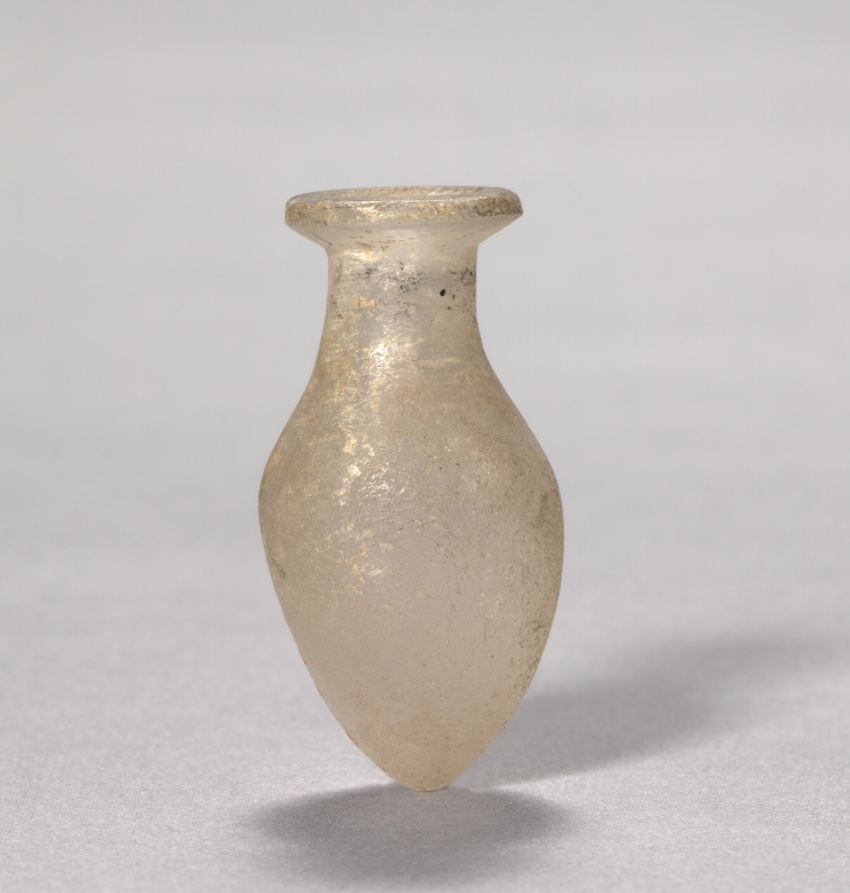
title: Magic Bottle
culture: Egypt, Old Kingdom (2647–2124 BCE), Dynasties 5–6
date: 2300–2124 BCE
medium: quartz crystal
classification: Vessels